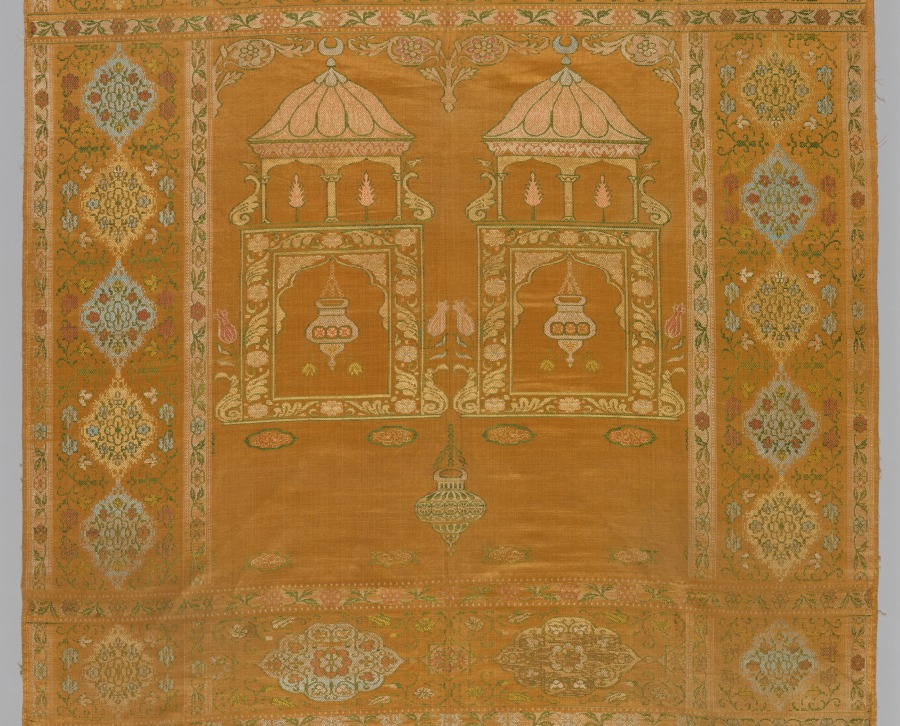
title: Coverlet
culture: Turkey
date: 1800s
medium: silk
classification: Textile